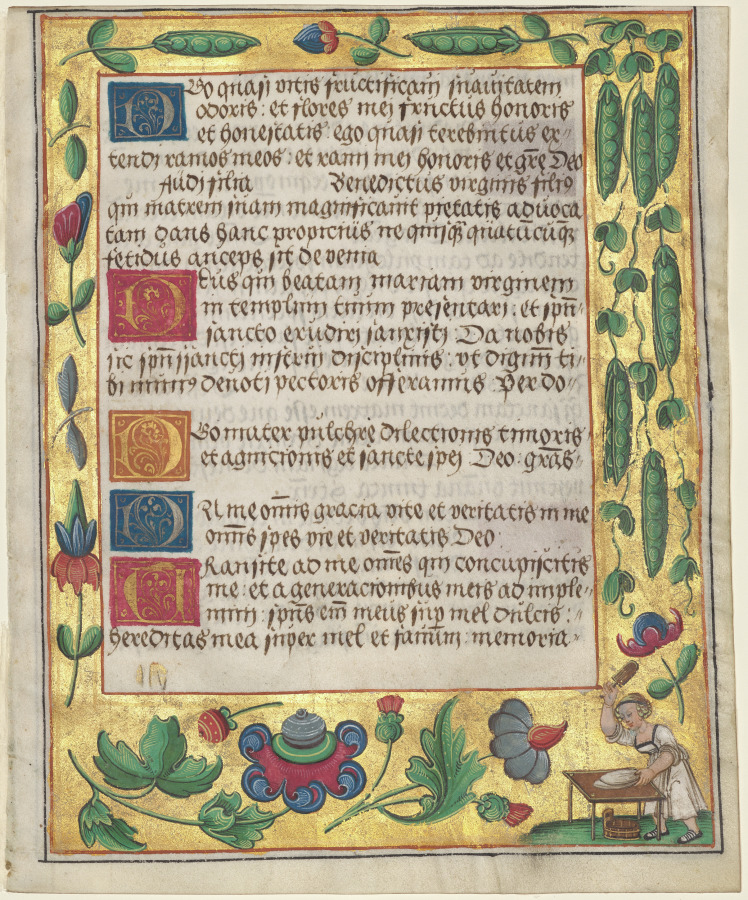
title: Leaf from a Psalter and Prayerbook: Ornamental Border with Pea Vines and a Girl Kneading Bread (recto)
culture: Germany, Hildesheim(?), 16th century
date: c. 1524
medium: ink, tempera and liquid gold on vellum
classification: Manuscript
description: This leaf and the one nearby were excised from the same prayer book. They reveal the favored secular motifs that include decorations with animals, peasants, and domestic activities such as cooking. Here a woman is shown kneading bread. A composite text combining features of a psalter, a collection of psalms or religious verses, and a prayer book, it was used during Mass and other services. The original book was a highly personalized volume written and illuminated in or around the city of Hildesheim in Northern Germany, as suggested by the prominent inclusion of Saint Godehard, Bishop of Hildesheim (died 1038), in the calendar (not shown).